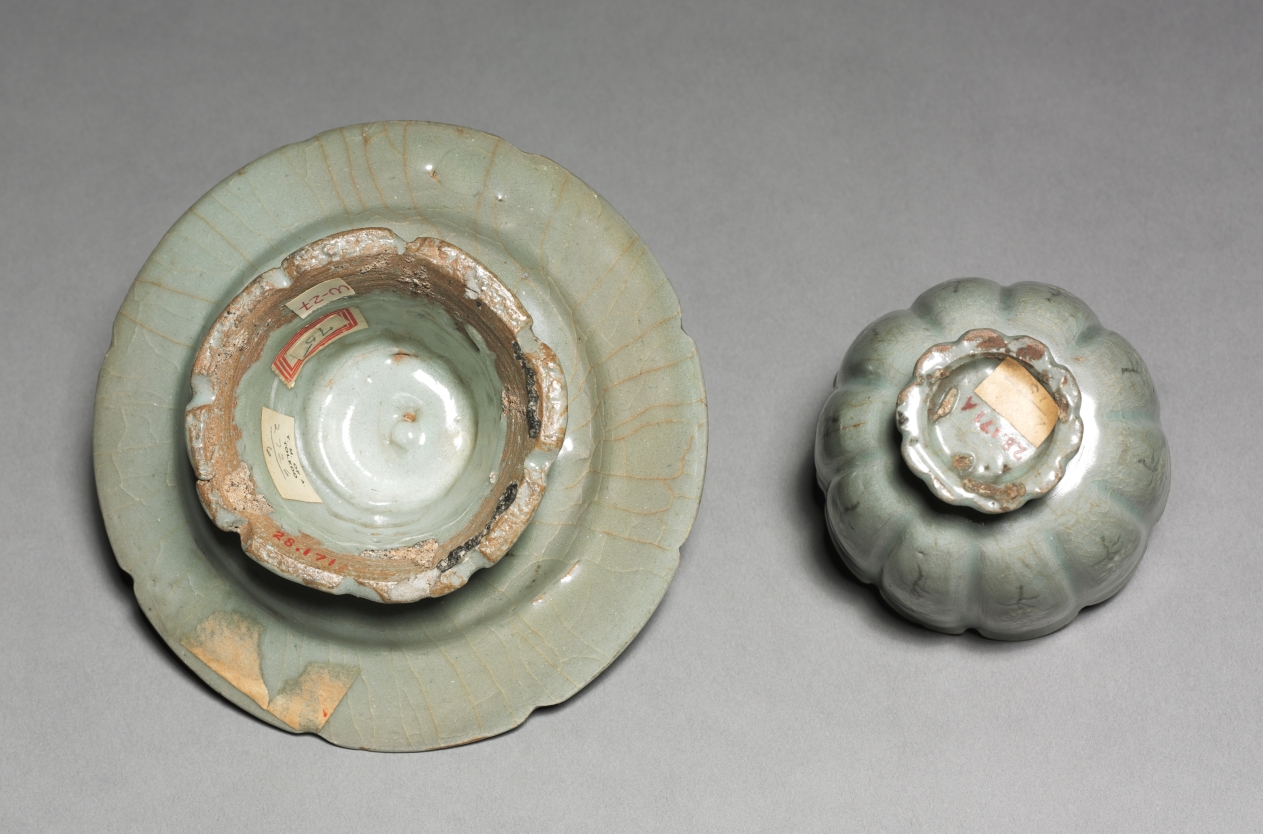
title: Floral-shaped Cup and Saucer with Inlaid Chrysanthemum Design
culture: Korea, Goryeo dynasty (918–1392)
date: 1100s-1200s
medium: Celadon ware with inlaid white and black slip decoration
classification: Ceramic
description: In Korea, chrysanthemum flowers and leaves were made into both tea and wine. Chrysanthemum wine was enjoyed during the the Double Nine Festival (the ninth day of the ninth month in the lunar calendar) praying for longevity. The flower design on the saucer is less delicate than the cup, suggesting that the cup and saucer originally were not related to each other.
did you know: Elites of the Goryeo period are known for their love of drinking tea and wine. In Korea, chrysanthemum flowers and leaves were made into both tea and wine.